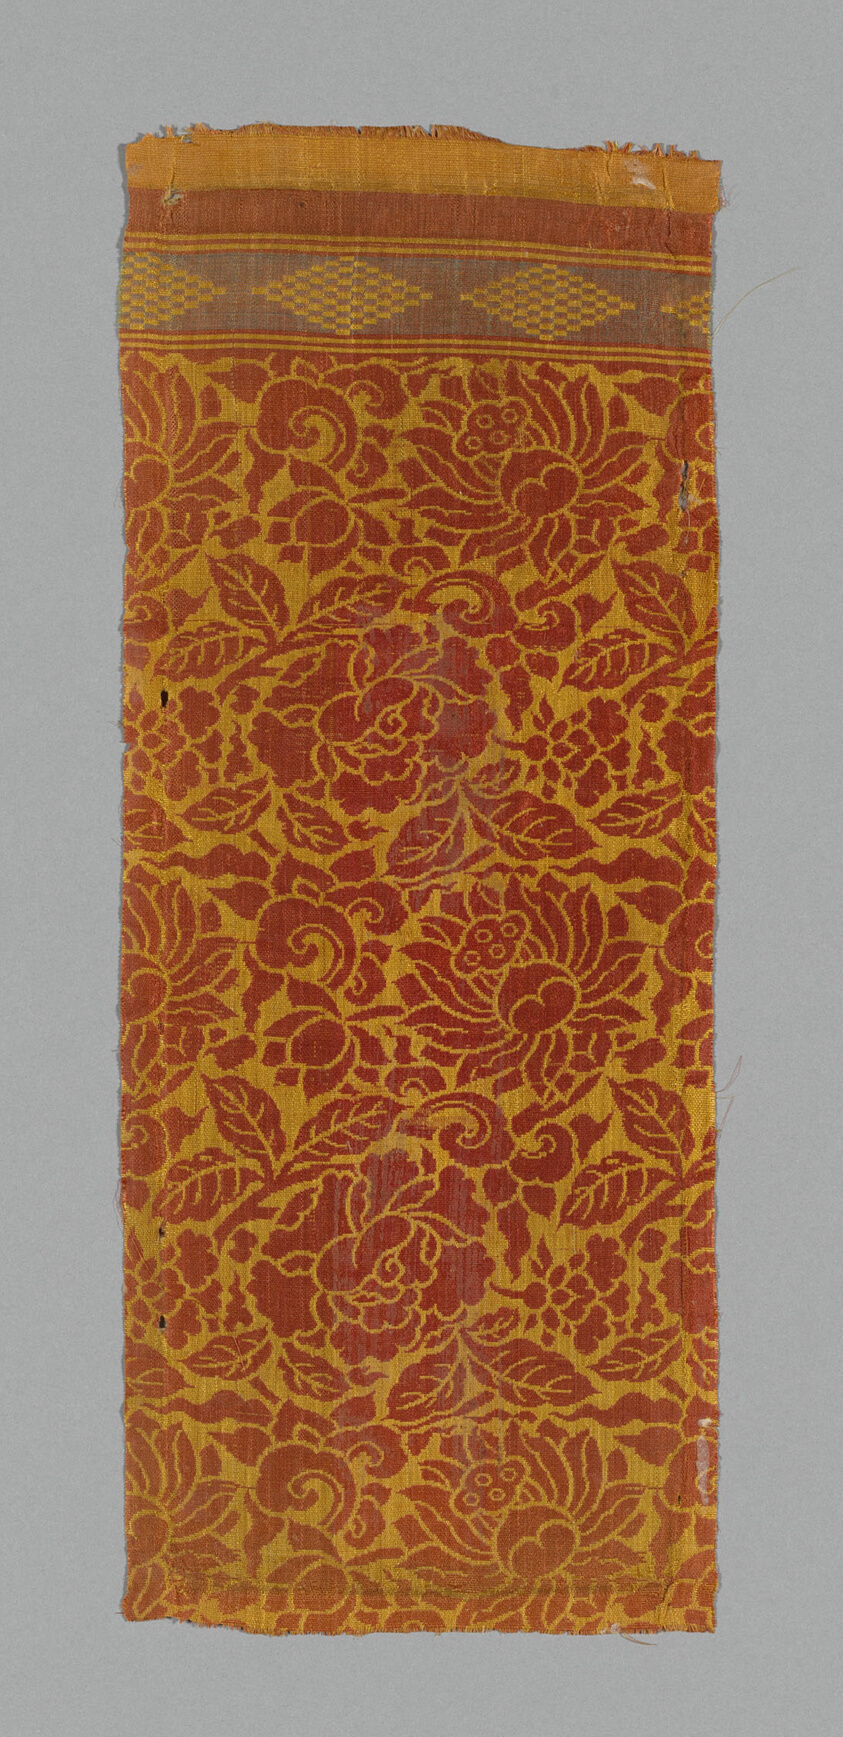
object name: Textile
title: Sutra Cover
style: ming, Chinese (culture or style), East Asian, asian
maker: China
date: Ming dynasty (1368–1644), c. 1590's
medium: Silk, plain weave double cloth with band of 1:3 'S' twill weave and of plain weave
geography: China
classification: textile; weaving